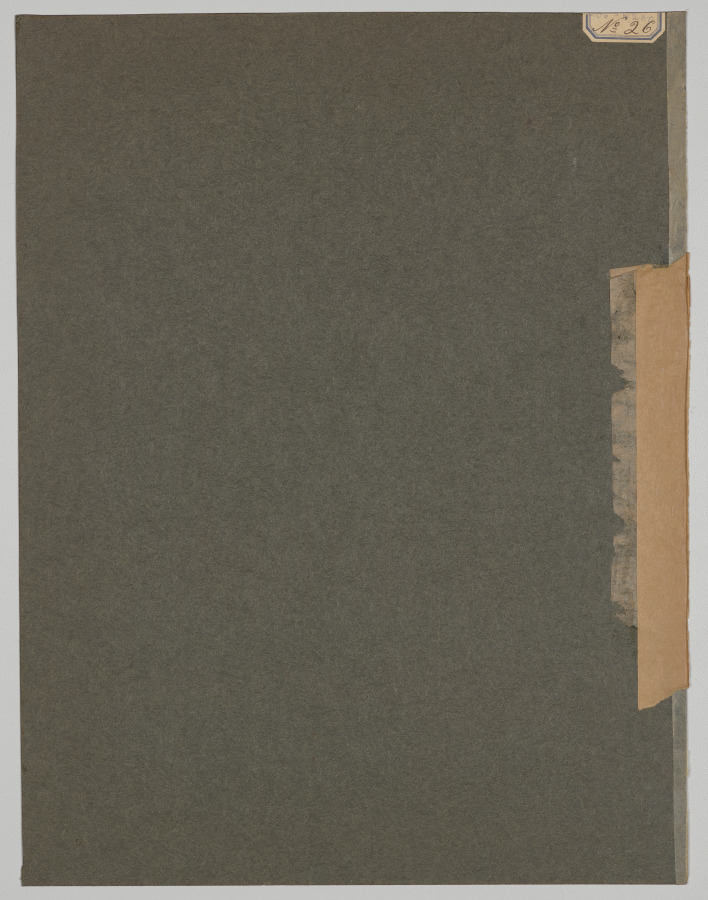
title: A scene of the life of Alexander from the Sharaf-nameh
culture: Iran, probably Shiraz, Safavid period (1501-1722)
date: 1500s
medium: Opaque watercolor, ink, and gold on paper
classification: Manuscript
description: This rare scene from the life of Alexander depicts a poor and pious woman falling into a desperate situation and giving birth to a son in some desolate place. Philip, the Macedonian ruler, is on a hunt and passes the ruin. Seeing the deceased woman with a hungry baby by her side, the King orders his followers to tend to the burial of the woman and brings up the orphan making him his crown prince.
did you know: This scene is from the Sharaf-nameh, the poetical version of the life of Alexander by the 12th-century Persian poet Niẓāmī Ganjavī.